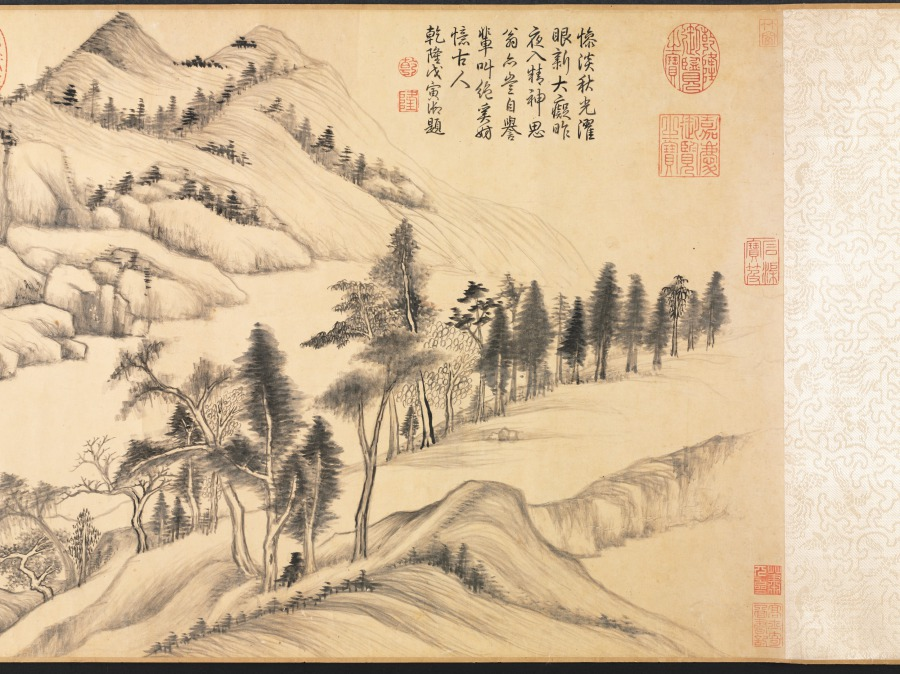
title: River and Mountains on a Clear Autumn Day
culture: China, Ming dynasty (1368–1644)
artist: Dong Qichang (Chinese, 1555–1636)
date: c. 1624–27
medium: Handscroll; ink on Korean paper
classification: Painting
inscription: 黃子久江山秋霽似此，當恨古人不見我也。思翁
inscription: 董文敏每遇高麗鏡面箋，書畫尤為入神。此卷改表紙用之，字跡隱然，兼有朝鮮之印。至於筆法圓秀，真接倪黃。豈文沈所可同日而語也。 康熙庚午中秋後一日，天氣澄爽，重裝初畢，跋於瓶廬。抱瓮翁高士奇。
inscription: Second inscription by Gao Shiqi 高士奇 (1645–1704): On the twenty-third day of the ninth month, the jiaxu year of the Kangxi era [1694], I packed my bags to head north. When my boat passed Wuchang [Suzhou], Mr. Mantang [Song Luo] brought wine to bid me farewell so that we could share our thoughts on our separation in the last few years. I showed him the paintings and calligraphy which I collected and asked his opinions. Since Mr. Mantang does not own any handscrolls by Wenmin [Dong Qichang], I leave this one for him in commemoration of our parting; thus the painting will have a worthy owner and our meeting will become a beautiful story in the future. It is the fourth day after the beginning of winter, with the sky clear and sober. Trees under frost have turned red and yellow, seemingly echoing the brush and ink in the painting. I also ask Mr. Mantang to inscribe a poem to commemorate our meeting so that it will survive forever.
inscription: 1 colophon and 4 seals of Song Luo 宋犖 (1634–1713): Who is the foremost art connoisseur of our dynasty?/ Tangcun [Liang Qingbiao, 1620–1691] is dead, so the title passes to Jiangcun [Gao Shiqi]./ Leaving office, you retired for five years in the Lake region./ Fondling handscrolls and hanging scrolls from morning to evening./ You sent me your collection catalogue Xiao Xia Lu last year;/ It is indeed the true equal of [Zhou Mi's] Yun Yan Guo Yan./ This year you returned to the capital by imperial order;/ Your boat with calligraphy and paintings anchored at the river bank in Suzhou./ When we met each other you did not waste any time for conversation by poured out immediately/ From your "coral net" extraordinary treasures./ You produced incomparable scrolls, with gold-inscribed labels and jade rollers,/ Pouring out from bags and trunks, they were spread in disarray./ Without a word, I rolled and unrolled until my fingers were numbed,/ We sat straight, facing each other quietly, and never felt tired./ For three days we forgot about sleeping and food./ And at times we shouted our joy out loud, forgetting who is host or guest./ Your Dwelling in the Fuchun Mountains and the Yuansheng manuscript/ These peerless works I myself examined with delight./ As an added pleasure to the farewell dinner under the Maple Bridge,/ You allowed me to hold again this handscroll by Dong Qichang--/ The Misty River and Piled Peaks [by Zhao Mengfu] and this Clear Autumn Day are two extraordinary masterpieces./ In showing such life and spirit with "qi yun." the artists were truly "men of heaven."/ The Clear Autumn Day is not even three feet long,/ Painted on tributary Korean paper, it shines like silver./ Every building up and every turn of the mountains imitates nature,/ Every tree and every rock is removed from the commonplace./ From the beginning, the theory of poetry is the theory of painting,/ Like the lotus and the morning sunshine, they complement and refresh each other./ The artist's inscription regrets that "the Old Masters cannot see my scroll."/ Huang Gongwang would have agreed in his grave./ The vermilion of the seals glitter and dazzles the eyes,/ These added accessories are as valuable as jade./ You are very kind to give it to me,/ The feelings expressed in your inscription are so sincere./ Wanting to refuse, but unable, I accept it to respect your wish,/ And taking off my gown and cap I wrapped it with care./ You asked me to write a long poem in commemoration of this beautiful occasion,/ I am too ashamed that my effort in response is so poor and inadequate./ Returning home, I unrolled it under candlelight, trying to write the colophon,/ The light of the waning moon shines at the foot of the mossy wall./ Earnestly humming and brows knit in deep thought, I try to compose;/ The verses are not outstanding, but the facts are real./ With this poem recorded at the end of the scroll, I mail it to you for approval,/ This poem and this painting shall outlast a thousand springs. (Translation by LYSL/HK/WKH)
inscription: 1 colophon and 2 seals of Shao Changheng 邵長蘅 (1637–1704); 2 inscriptions and 14 seals of the Qianlong 乾隆 emperor (r. 1736–95); 1 seal of the Jiaqing 嘉慶 emperor (r. 1796–1820); 3 seals of the Xuantong 宣統 emperor (r. 1908–11); 1 seal unidentified.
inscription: [印] 朝鮮國王之印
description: Dong Qichang had a tremendous impact on the artistic practices and historiography of later generations; his works and writings shaped literati aesthetics. Here, Dong places an abstract landscape composition diagonally across the picture plane, configured to recall earlier masters and simultaneously express his own personal style. Dong’s inscription claims, Huang Gongwang’s Autumn Day, looks like this. I truly regret the master has not seen my work. In fact, Dong Qichang may have had Dong Yuan’s Xiao and Xiang Rivers in mind, a work he owned and considered a key work in Chinese art history.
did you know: The painting has an imprint of a Korean seal that reads "Seal of the king of Joseon."